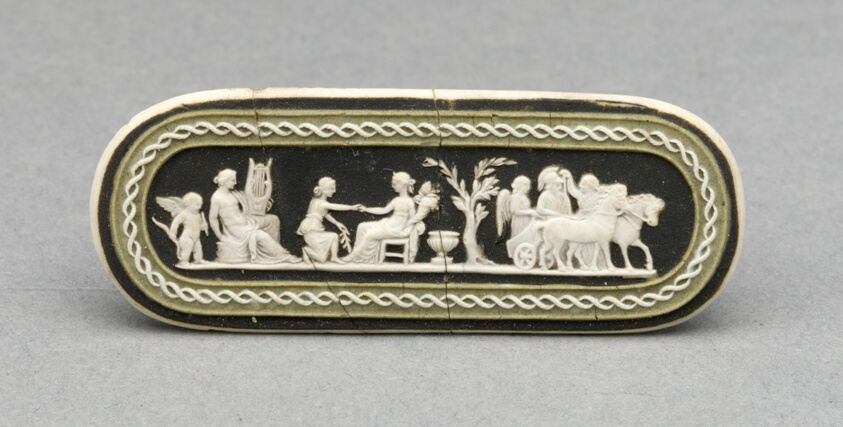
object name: Ceramics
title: Cameo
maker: Wedgwood Manufactory (England, founded 1759)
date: 1775/1800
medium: Stoneware (jasperware)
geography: Burslem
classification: cameo (sculpture); sculpture; stoneware; european decorative arts; ceramics